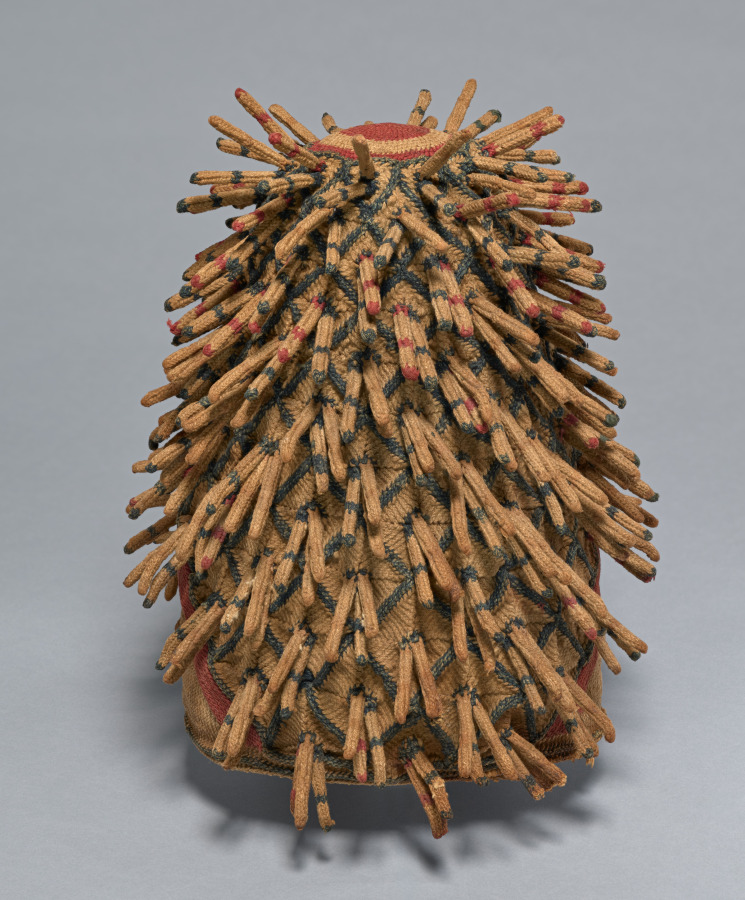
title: Prestige Headdress (Ashetu or shüötu)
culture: Bamum style, unknown maker, Grassfields region, Cameroon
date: 1900–1950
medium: cotton, dye (including indigo)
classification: Textile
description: The bristle-like surface of this man’s prestige headdress is dyed with indigo or a red pigment. Below, a diamond pattern evokes another royal symbol, the leopard. The projections are reinforced with small pieces of wood. Such extensions are seen on prestige headgear represented in wood in sculptures and in colored pencil on drawings in the collection.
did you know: Titled men still wear such prestigious adornment today.